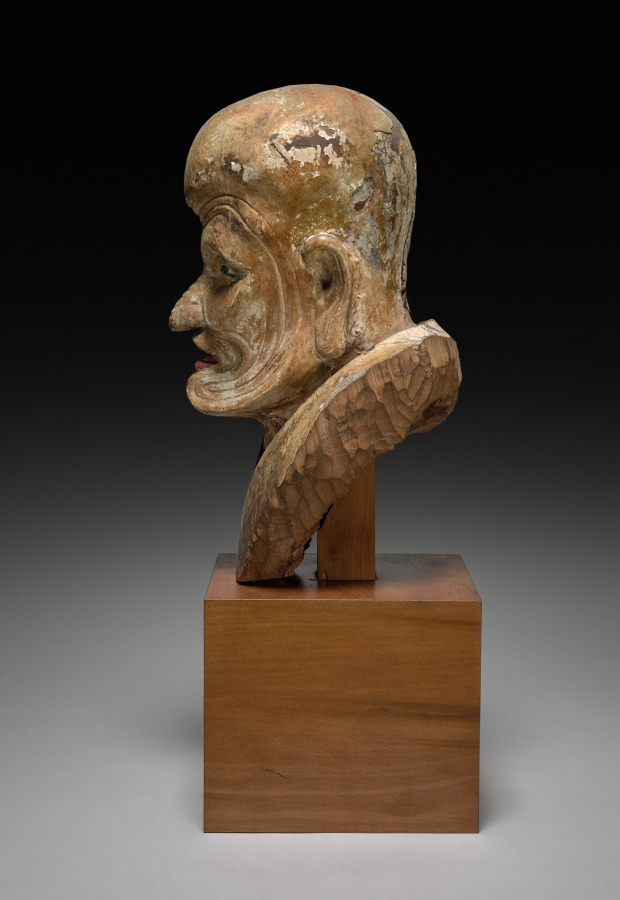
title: Head of a Patriarch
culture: China, Ming dynasty (1368-1644) or earlier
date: 1368–1644 or earlier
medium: wood covered with lacquer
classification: Sculpture